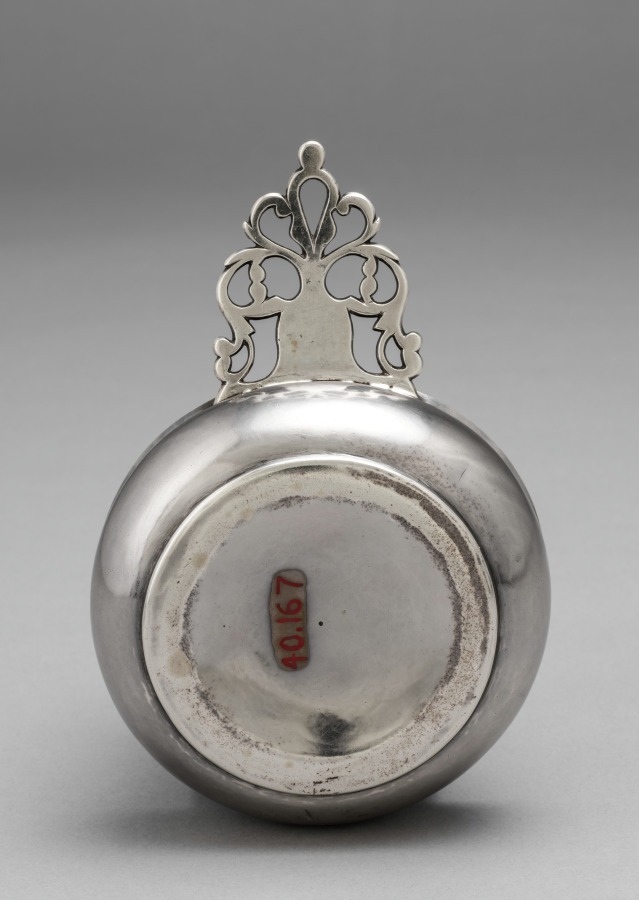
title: Porringer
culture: America, Massachusetts, Boston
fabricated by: Samuel Burt (American, 1724–1754)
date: 1740–50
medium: silver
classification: Silver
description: "Porringer" was the term used in America for a bowl with one handle.